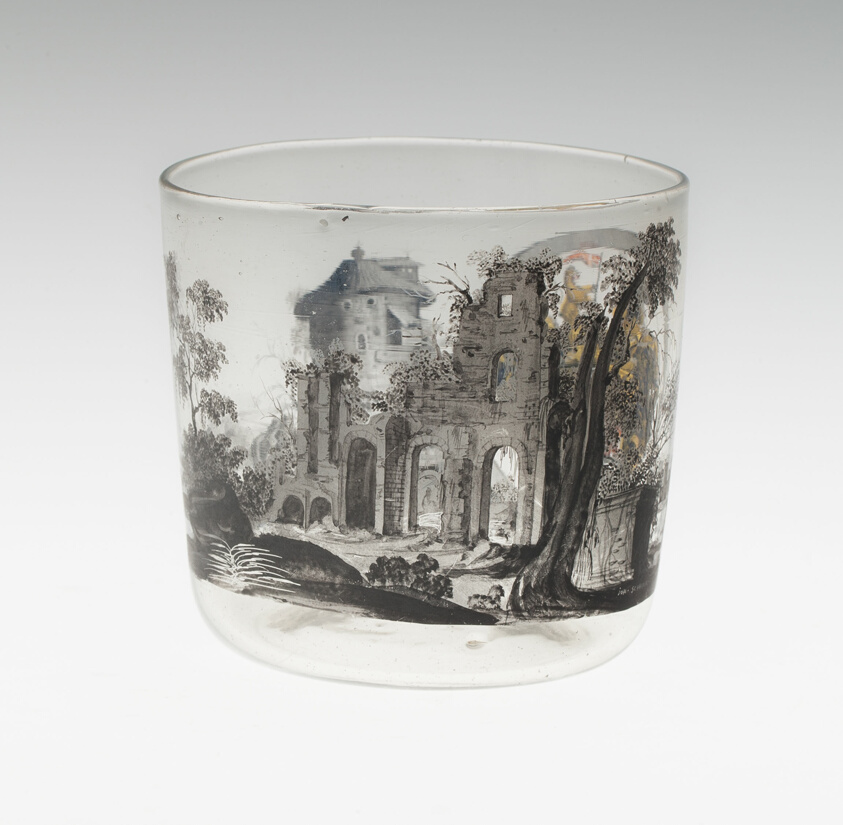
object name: Glass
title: Beaker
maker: Painted by Johann Schaper; German, 1621-1670; Nuremberg, Germany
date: c. 1665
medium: Glass with enamel decoration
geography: Nuremberg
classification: glass; european decorative arts